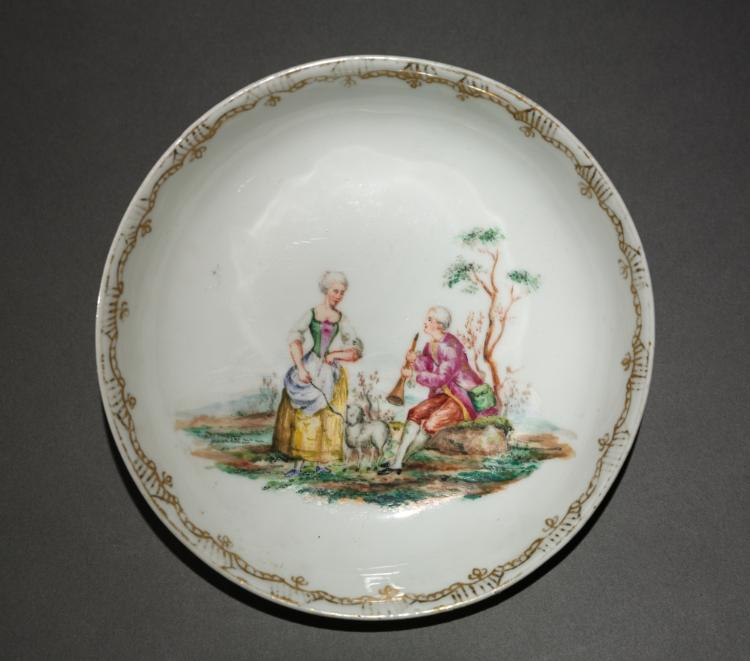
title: Saucer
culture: Germany, 18th century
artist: Meissen Porcelain Factory (German, est. c. 1710)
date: c. 1750–70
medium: porcelain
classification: Ceramic